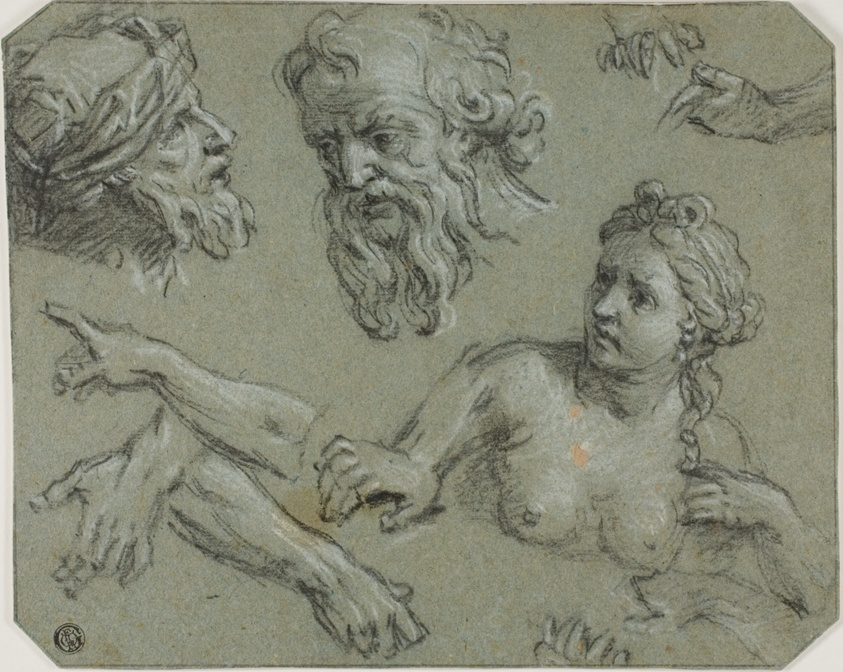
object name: Drawing and Watercolor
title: Sketches of Half-Length Female Nude, Male Heads, Arms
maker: Louis de Boullogne, the elder (French, 1609-1674)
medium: Black chalk, heightened with white chalk, on blue laid paper, laid down on ivory wove card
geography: France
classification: chalk; drawings (visual works); prints and drawing